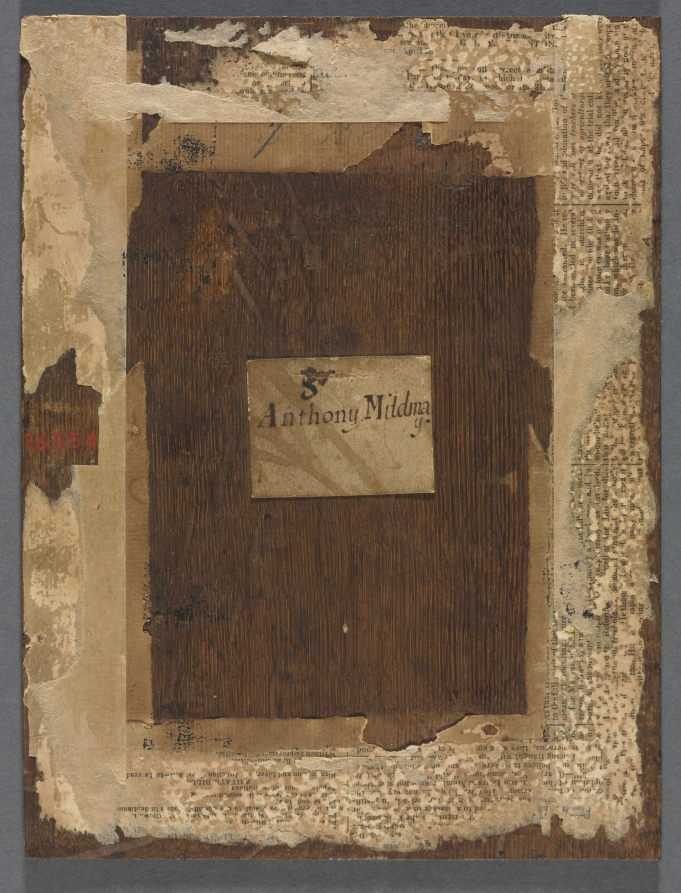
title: Sir Anthony Mildmay, Knight of Apethorpe, Northamptonshire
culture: England, 16th century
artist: Nicholas Hilliard (English, c. 1547–1619)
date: c. 1590–93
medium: Watercolor on vellum, laid on card, mounted on wood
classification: Portrait Miniature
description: Framed by the folds of a circular tent, Sir Anthony Mildmay strikes a relaxed and confident pose, with his right hand resting on a cloth-covered table and his left grasping the hilt of his thin, double-edged sword called a rapier. Helmet, gauntlet, and leg coverings are scattered about, as if Mildmay has been interrupted in the act of putting on or taking off his armor. Despite its small scale, this portrait reveals Nicholas Hilliard’s emulation of (and rivalry with) life-size court portraiture, while his meticulous attention to detail and use of costly materials like shell gold reflect the refined world of courtly tournaments.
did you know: A little dog gazes adoringly at Mildmay who was by all accounts a very arrogant man.